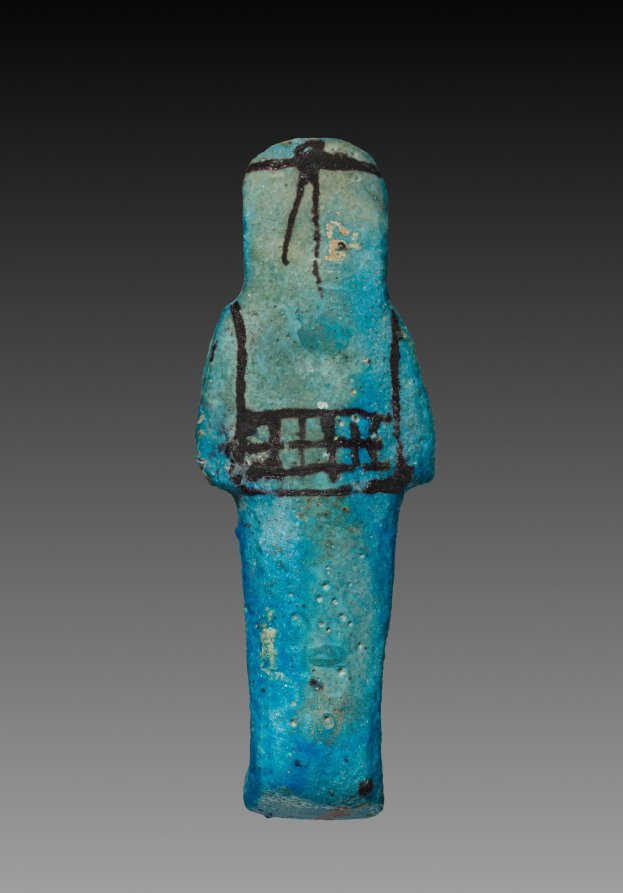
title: Shawabty of Herytwebkhet (Harweben)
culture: Egypt, Third Intermediate (1069–715 BCE), Dynasty 21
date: 1000–956 BCE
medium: turquoise faience with black decoration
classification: Funerary Equipment